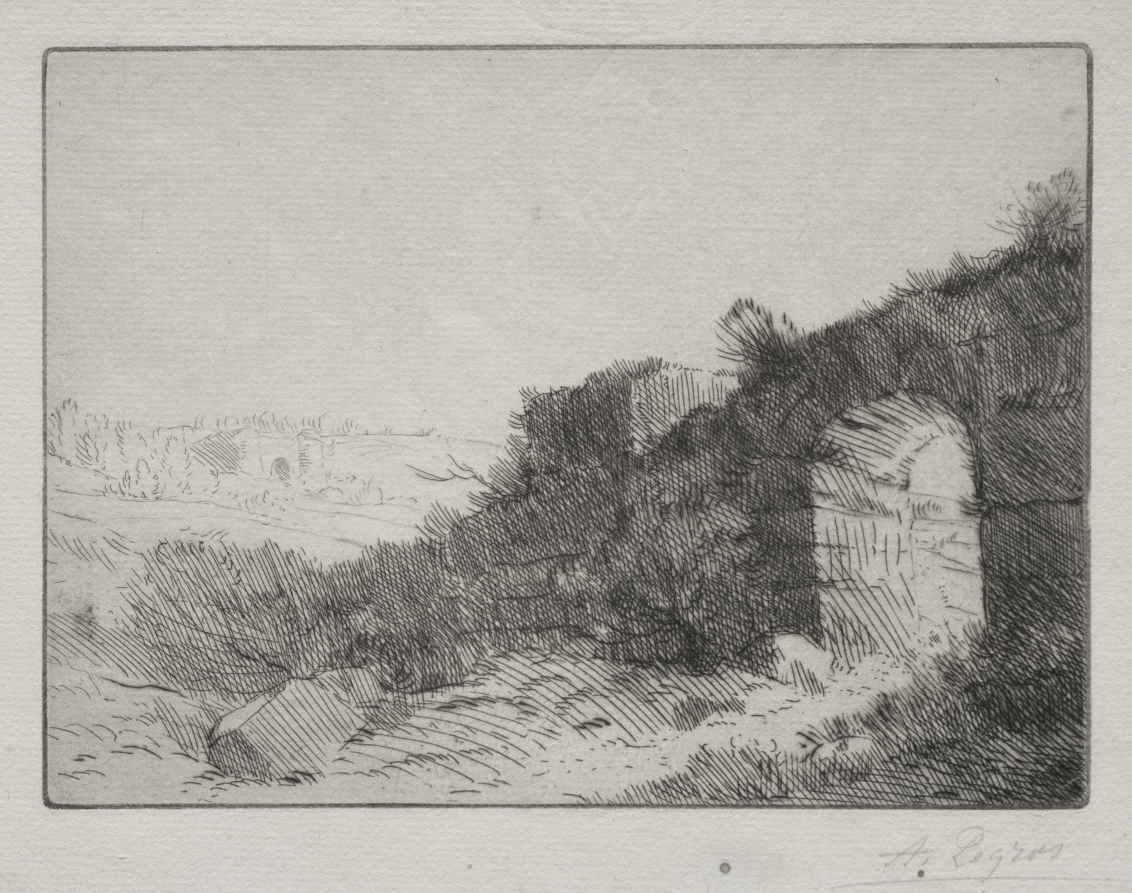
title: Roman Ruins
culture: France, 19th century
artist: Alphonse Legros (French, 1837–1911)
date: c. 1857–1911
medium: drypoint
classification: Print